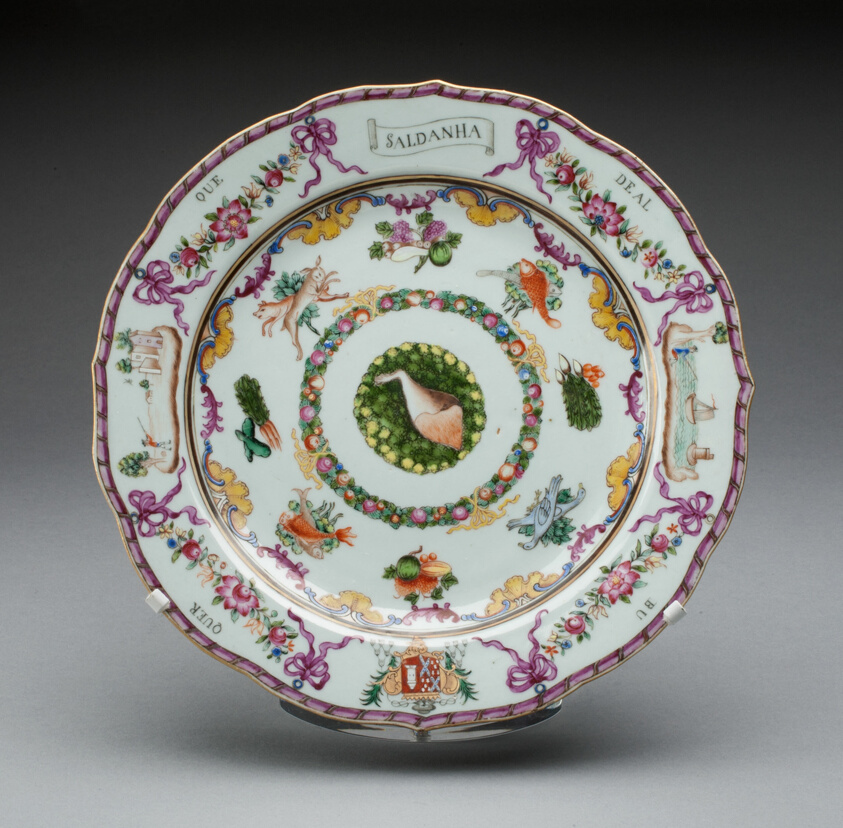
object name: Ceramics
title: Plate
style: chinese export, Chinese (culture or style), East Asian, asian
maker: China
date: 1760/70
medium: Hard-paste porcelain with polychrome enamels and gilding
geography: China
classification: plate (general, dish); dish (vessel); chinese export porcelain; porcelain; european decorative arts; ceramics